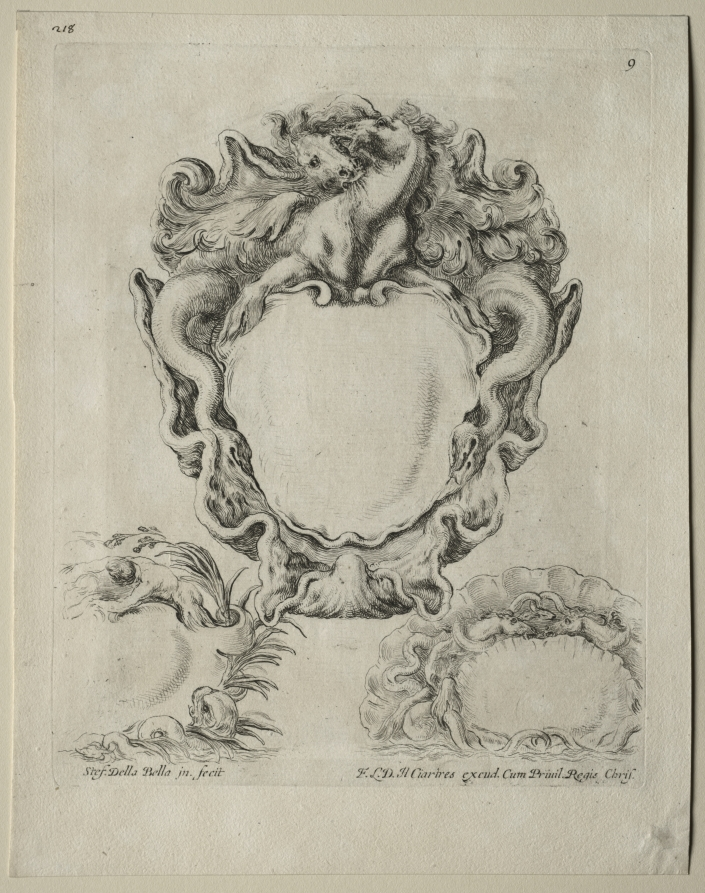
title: Collection of Various Caprices and New Designs of Cartouches and Ornaments: No. 9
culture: Italy, 17th century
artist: Stefano Della Bella (Italian, 1610–1664)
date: 1646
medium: etching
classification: Print